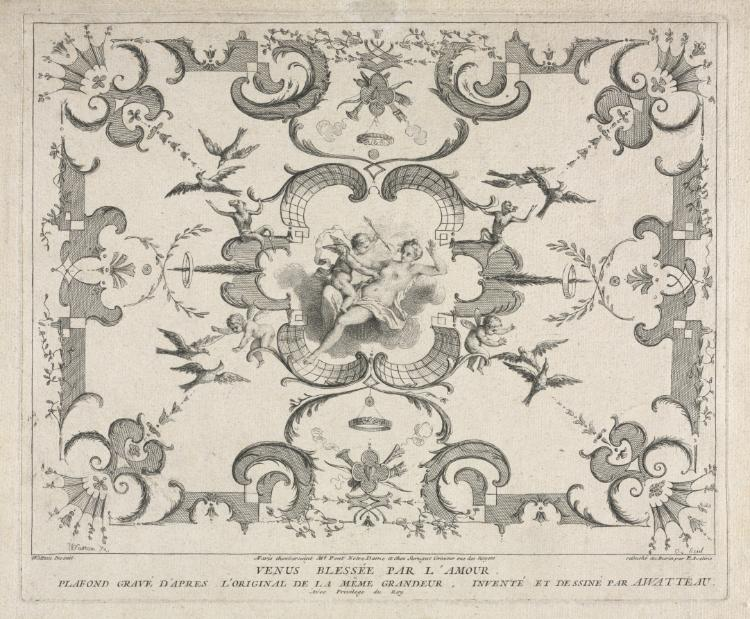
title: Venus Wounded by Cupid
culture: France, 18th century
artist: Pierre Alexandre Aveline (French, 1710–1760)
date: c. 1731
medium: engraving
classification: Print